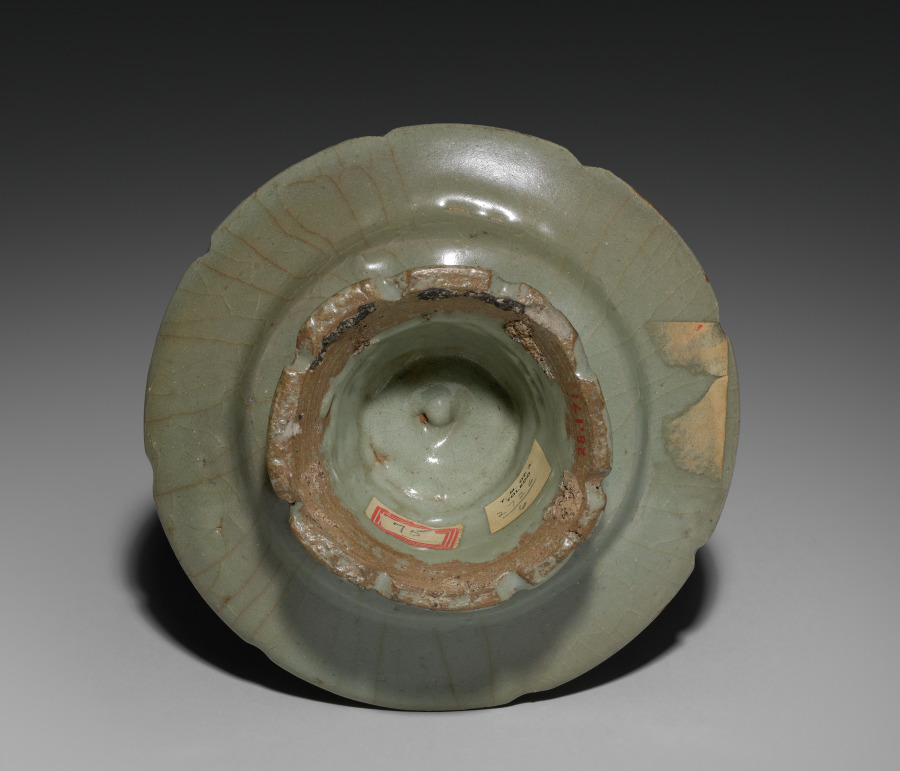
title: Saucer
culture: Korea, Goryeo dynasty (918–1392)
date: 1100s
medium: Celadon ware with inlaid white and black slip decoration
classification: Ceramic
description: This celadon wine cup is inlaid with a chrysanthemum pattern that reflects Koreans’ enjoyment of both the poem "Drinking Wine" and the blessings of longevity associated with the Double Nine Festival. The flower design on the saucer is less delicate than the cup, as the cup and saucer were originally from different sets; they were later paired together after each lost its mate.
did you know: Elites of the Goryeo period are known for their love of drinking tea and wine. This type of delicate-looking cup stand not only made their drinking experience more enjoyable, but also showed their refined taste.